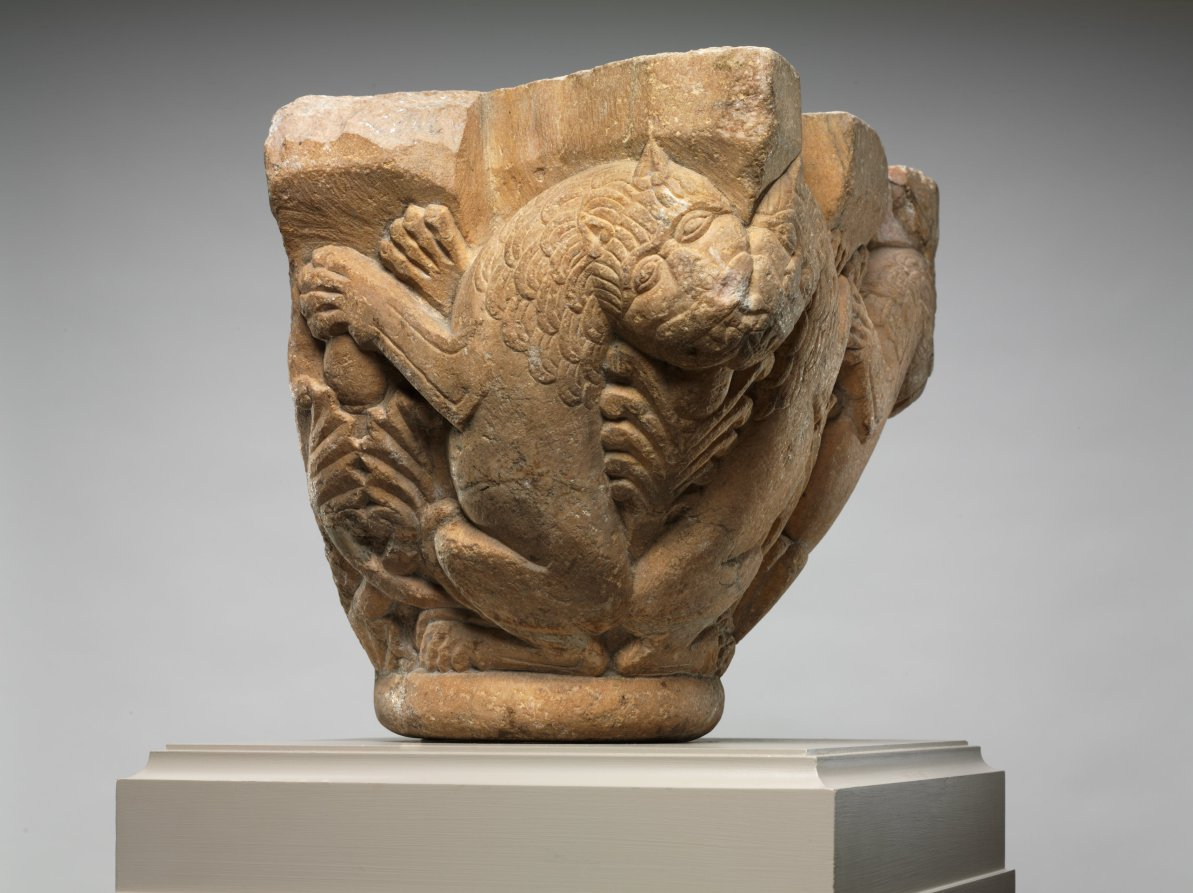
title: Engaged Capital with Lions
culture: Northern Spain (Navarre ?) or Southwest France (Pyrénées or Roussillon ?), mid-12th century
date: 1145–64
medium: marble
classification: Sculpture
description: The compositional motif of confronted and addorsed beasts illustrated on this capital was especially popular in churches along the pilgrimage roads.